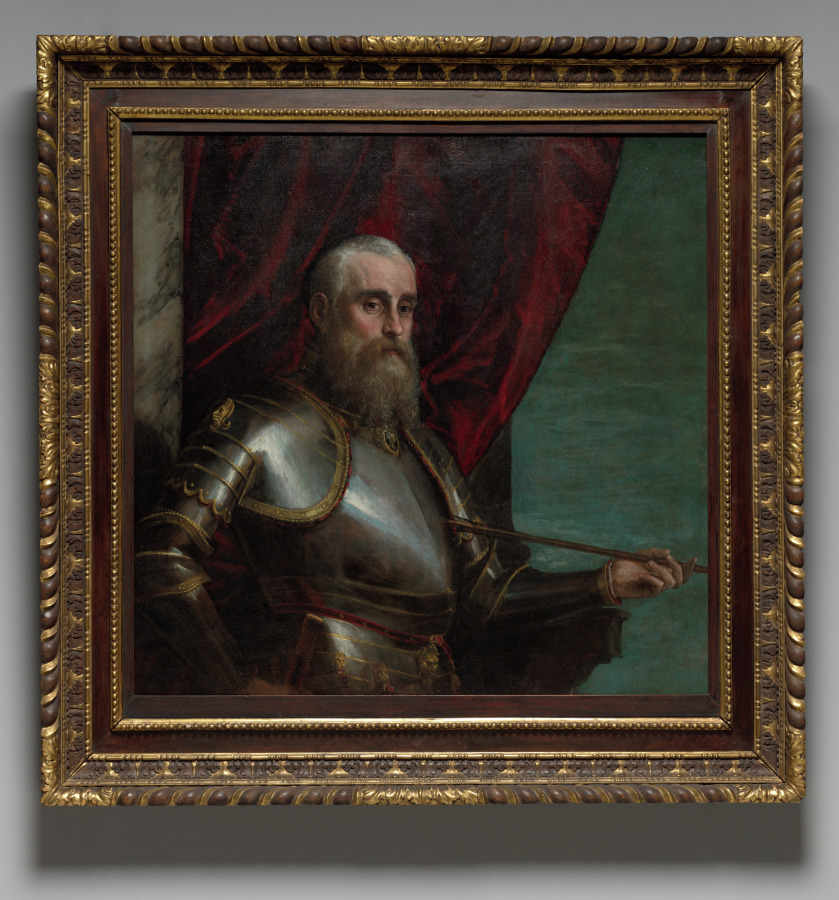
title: Portrait of Agostino Barbarigo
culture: Italy, Venice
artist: Paolo Veronese (Italian, 1528–1588)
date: after c. 1571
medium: oil on canvas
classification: Painting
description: Barbarigo served as second in command of the Venetian naval forces during the Battle of Lepanto, fighting against the Ottoman Empire on October 7, 1571. During the skirmish, Barbarigo was slain by a Turkish arrow, which he holds in the portrait. Barbarigo’s identity is defined by his military prowess. In the 1500s, Venetian military portraits often portrayed the sitter in armor in a pose typical of a Roman emperor, creating a link to the valor and might of ancient armies.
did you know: The arrow symbolically indicates that this portrait was painted after the sitter died in battle.